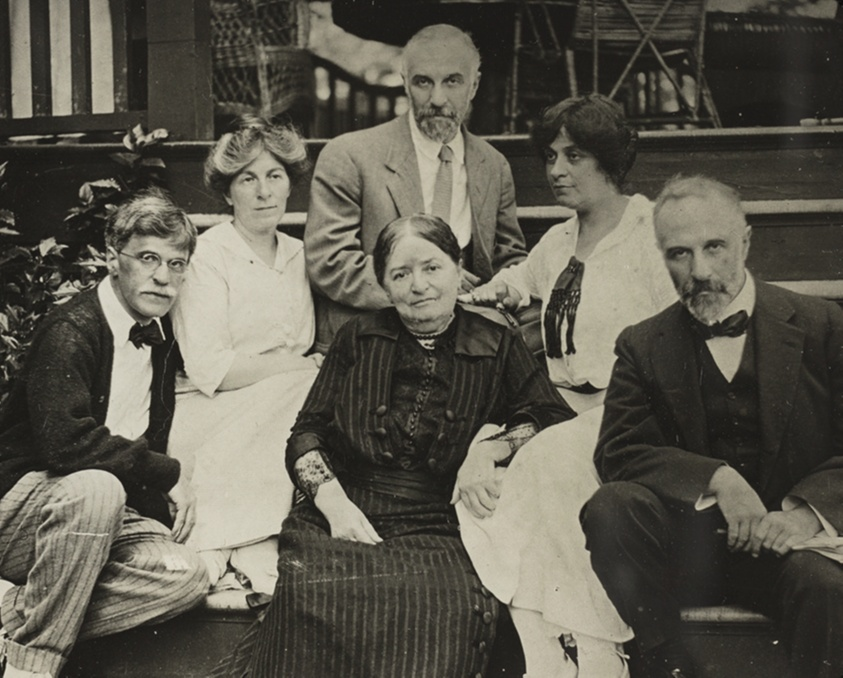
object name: Photograph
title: Untitled (Stieglitz, Agnes, mother Hedwig, Julius, Selma, and Lee on Oaklawn steps)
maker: Alfred Stieglitz (American, 1864–1946)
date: 1910 or 1912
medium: Lantern slide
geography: United States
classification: lantern slide (glass); negative/transparency; photography; photograph